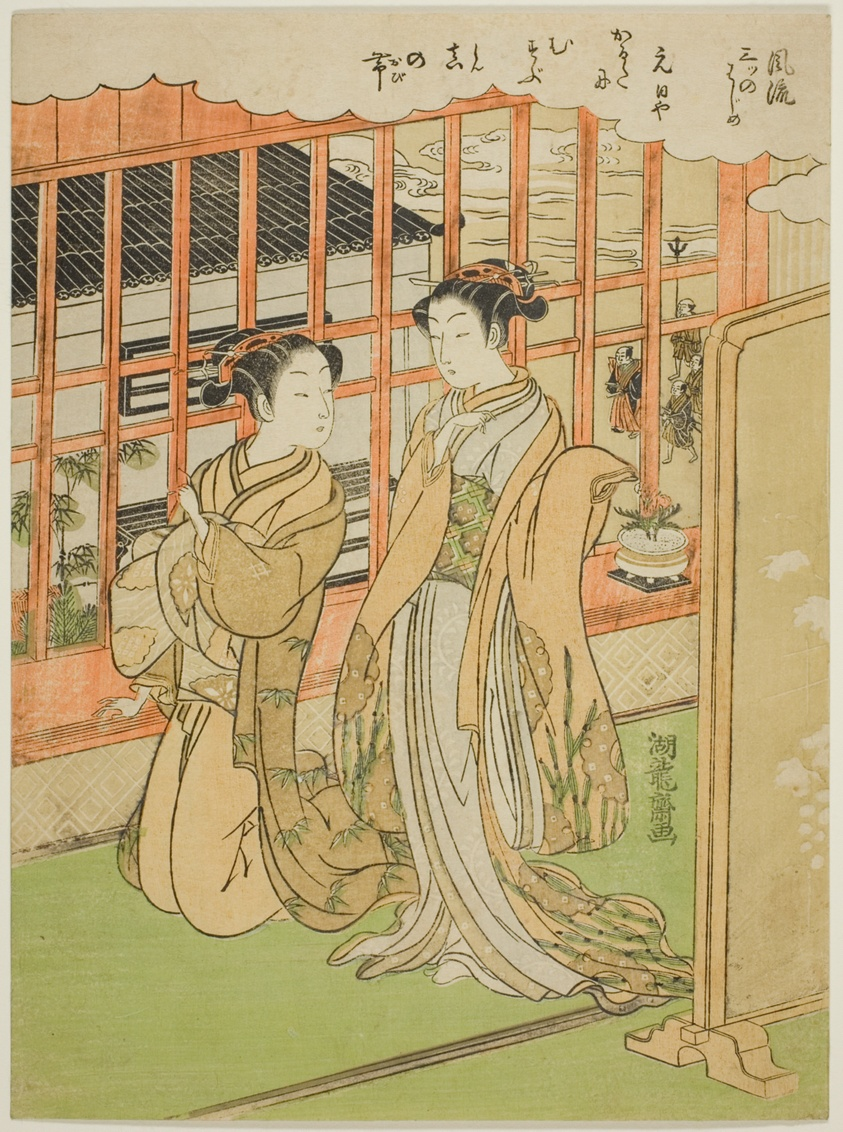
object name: Print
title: New Year's Day, from the series "Fashionable Three Beginnings (Furyu mittsu no hajime)"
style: Japanese (culture or style)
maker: Isoda Koryusai (Japanese, 1735-1790)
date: c. 1770/72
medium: Color woodblock print; chuban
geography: Japan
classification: woodblock print; print; asian art